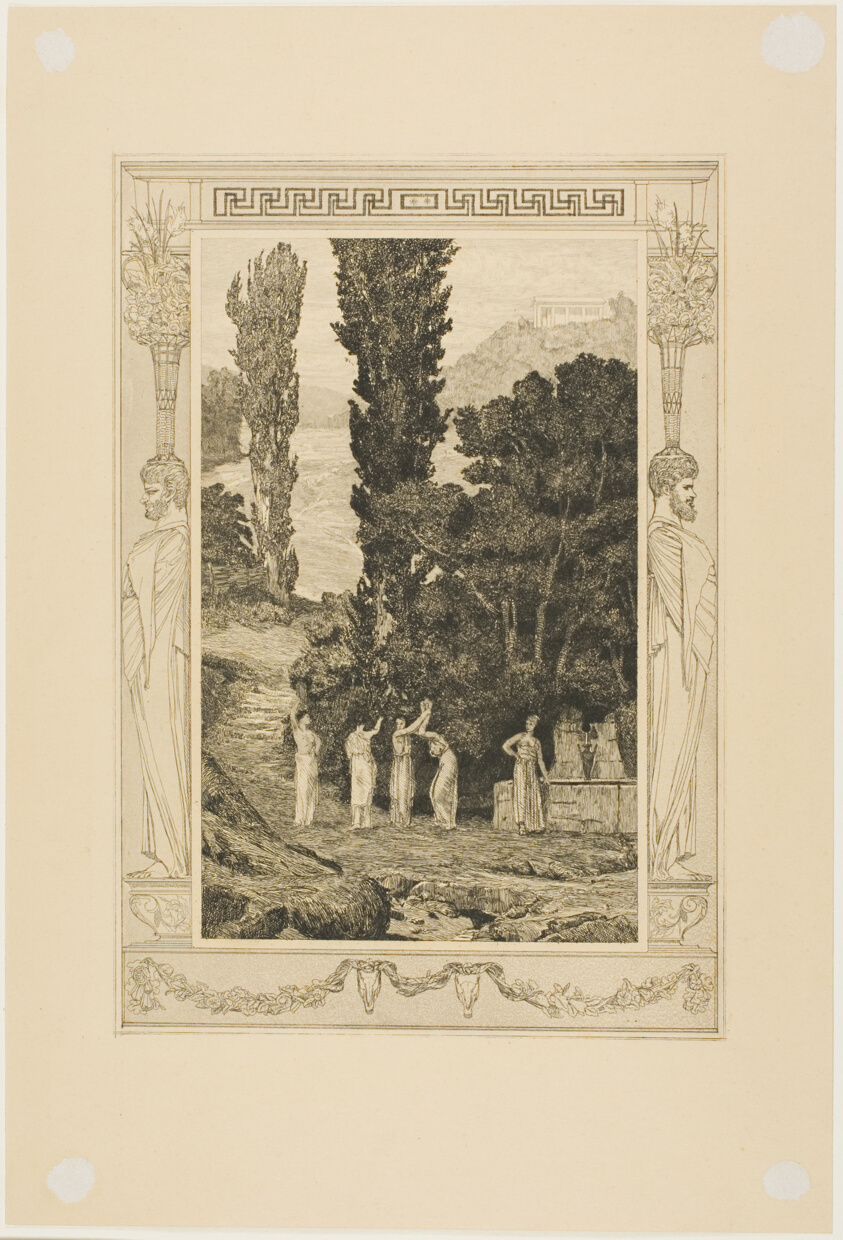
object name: Print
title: Psyche Wandering, plate 28 from Cupid and Psyche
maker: Max Klinger (German, 1857-1920)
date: 1880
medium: Etching and aquatint on paper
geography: Germany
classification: etching; print; prints and drawing